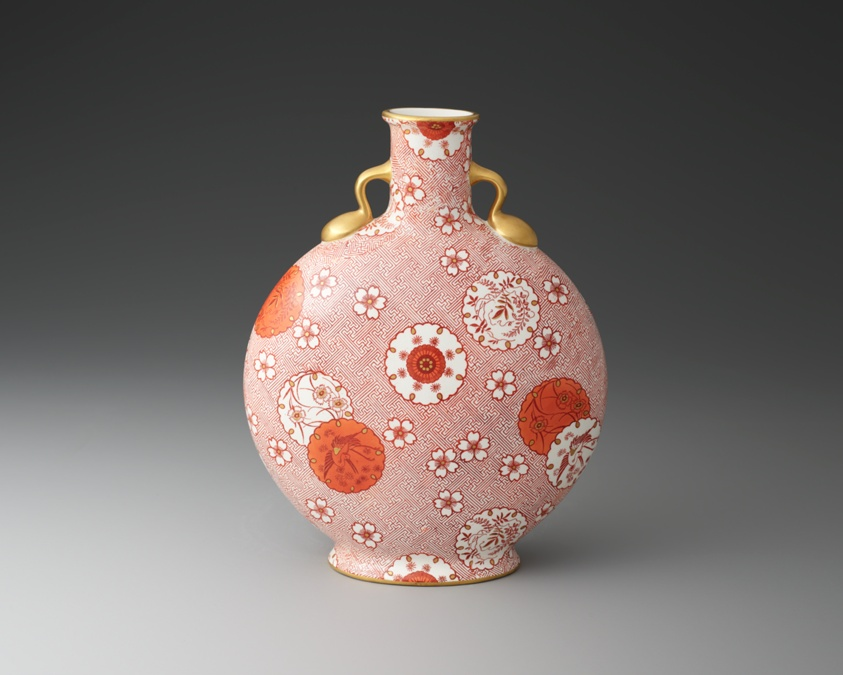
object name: Ceramics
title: Moon Flask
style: Japanism, 19th century, Aesthetic Movement, Aestheticism, english, japonism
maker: Minton (Stoke-on-Trent, England, founded 1793)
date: c. 1878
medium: Bone china, enamel, and gilding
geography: Stoke-on-Trent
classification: ceramics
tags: vase, moon